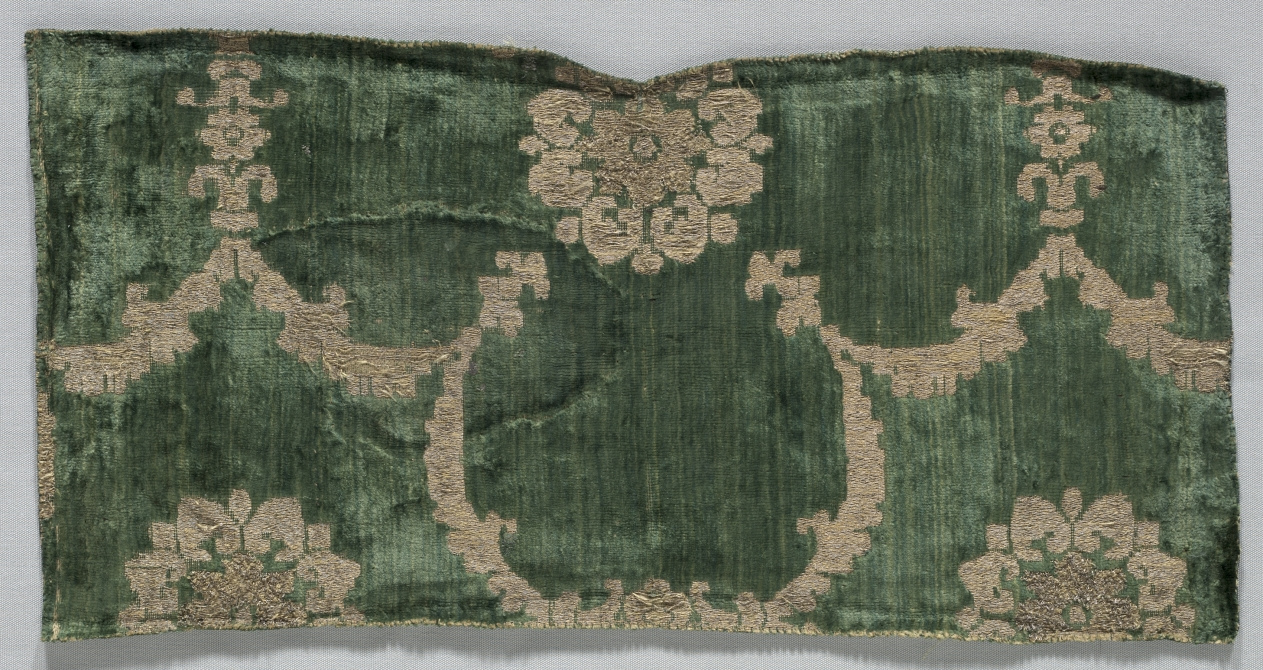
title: Velvet Fragment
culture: Italy, 15th century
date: 1400s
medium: velvet (cut, voided, and brocaded): silk and gold thread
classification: Velvet